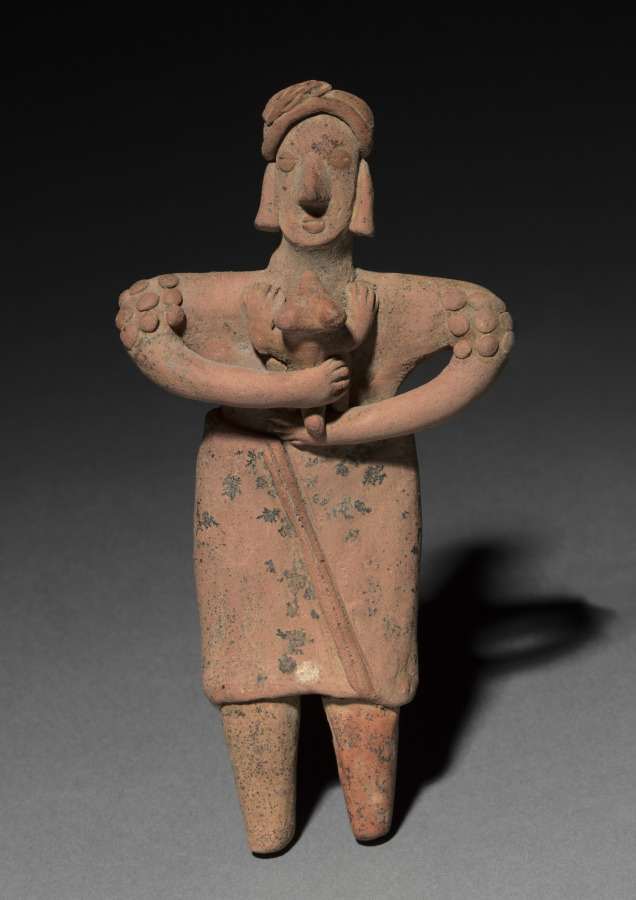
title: Standing figurine holding an animal (dog?)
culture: Mesoamerica, West Mexico, Colima or Jalisco state, possibly Tuxcacueso-Ortices municipality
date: 300 BCE–300 CE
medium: ceramic and pigment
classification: Ceramic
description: Clay figurines were the earliest and most common art form in Mexico and other countries in the ancient Mesoamerican (Middle American) culture region. Made first by hand and later with molds, most figurines belong to the traditions of commoners, such as farmers, rather than those of elites.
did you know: Clay figurines were the earliest and most common art form in the ancient Mesoamerican culture region.